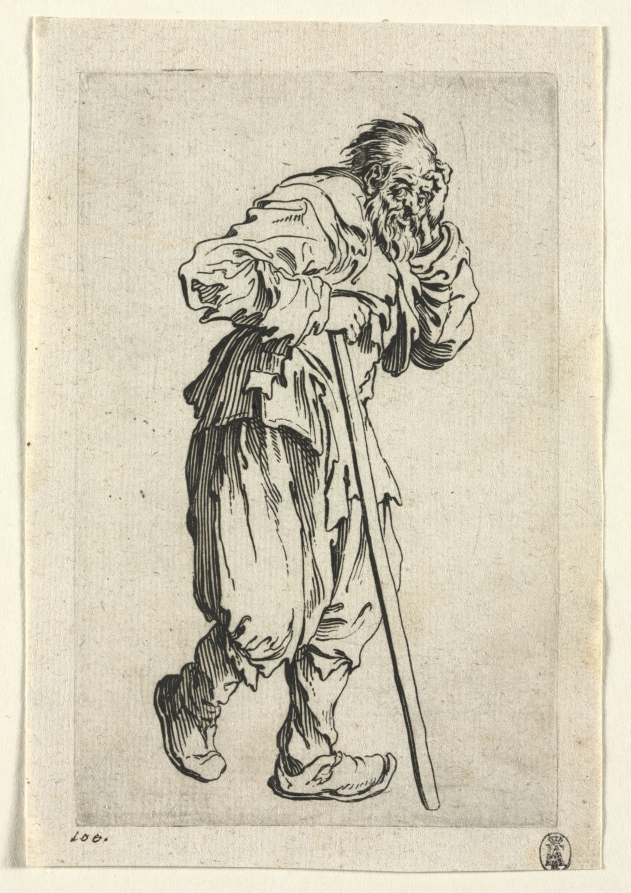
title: The Beggars: Beggar Leaning on a Stick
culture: France, 17th century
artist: Jacques Callot (French, 1592–1635)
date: c. 1623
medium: etching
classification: Print